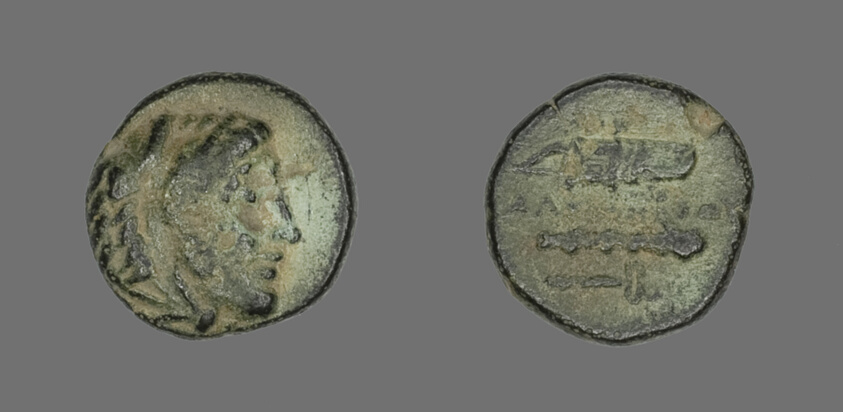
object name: Coin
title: Coin Depicting the Hero Herakles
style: greek, ancient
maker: Greek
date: 336-323 BCE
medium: Bronze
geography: Ancient Greece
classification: coin; ancient art